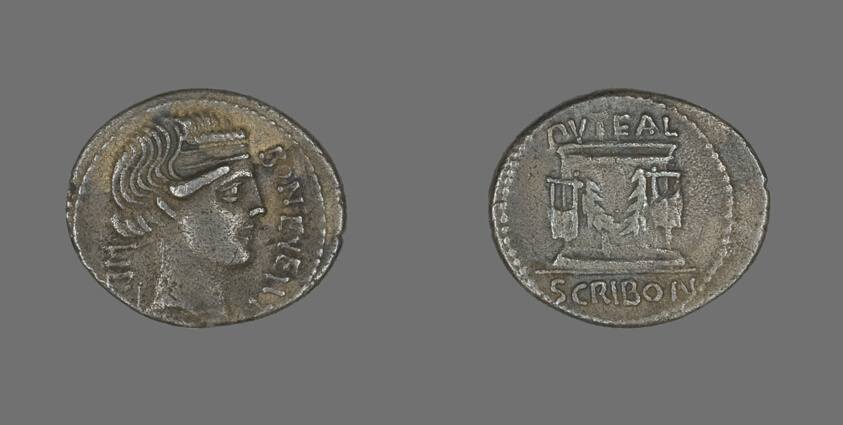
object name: Coin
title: Denarius (Coin) Depicting Bonus Eventus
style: roman (ancient, style or period), ancient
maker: Roman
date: 62 or 54 BCE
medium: Silver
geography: Roman Empire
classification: coin; ancient art